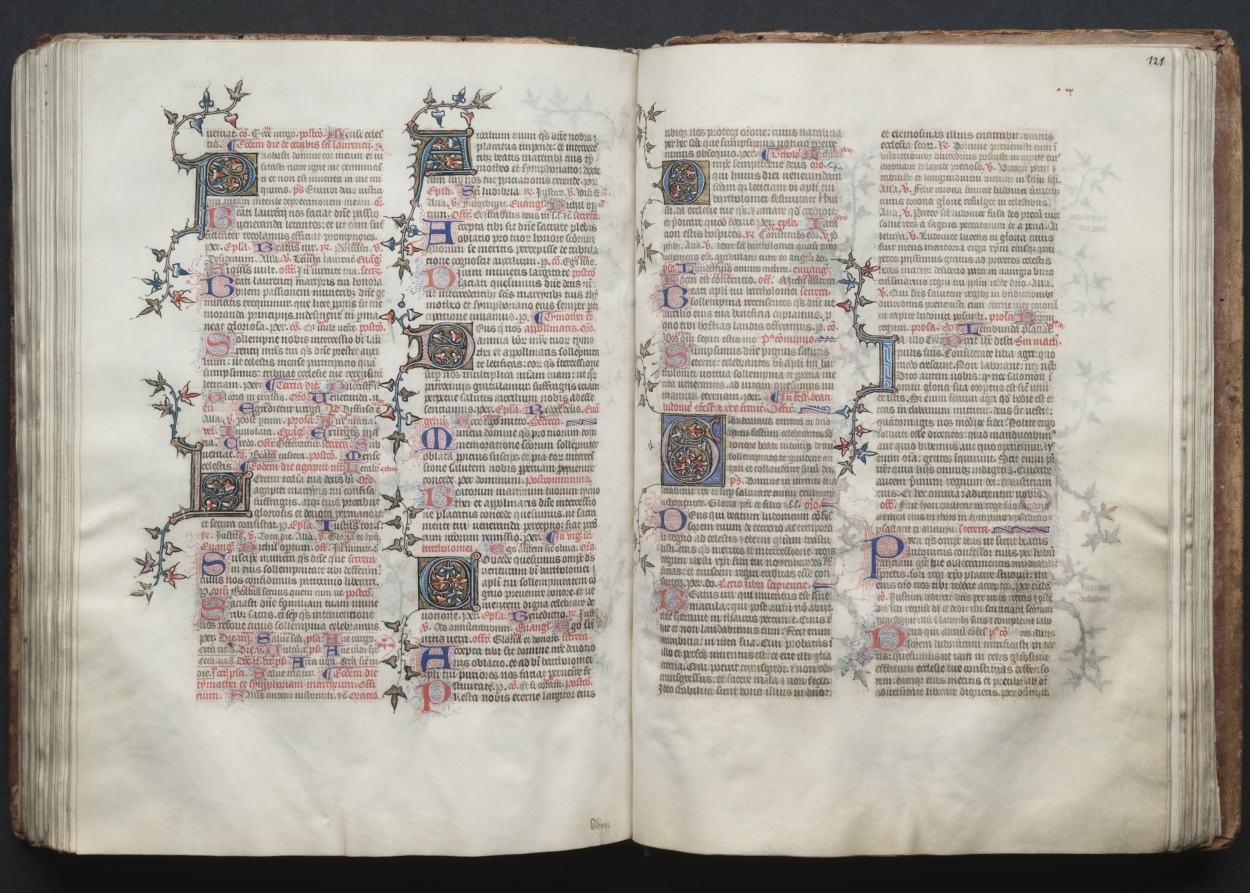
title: The Gotha Missal: Fol. 121r, Text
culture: France, Paris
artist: Master of the Boqueteaux (French)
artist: and Workshop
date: c. 1375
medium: ink, tempera, and gold on vellum; blind-tooled leather binding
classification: Bound Volume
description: The style and quality of this manuscript's decoration is typical of deluxe Parisian books made for aristocratic or royal patrons. Most of the book's decoration appears to be the work of the Master of the Boqueteaux, an artist active at the court of King Charles V (died 1380). His style was apparently shared by a number of book illuminators working in and around Paris. It is very possible that the Gotha Missal belonged to Charles V, but is not provable because the manuscript has no royal portraits and lacks a colophon. Given the book's magnificent decoration, however, it would seem that it was produced for a Valois prince, if not for the king himself. The manuscript receives its name from the German dukes of Gotha, its later owners.